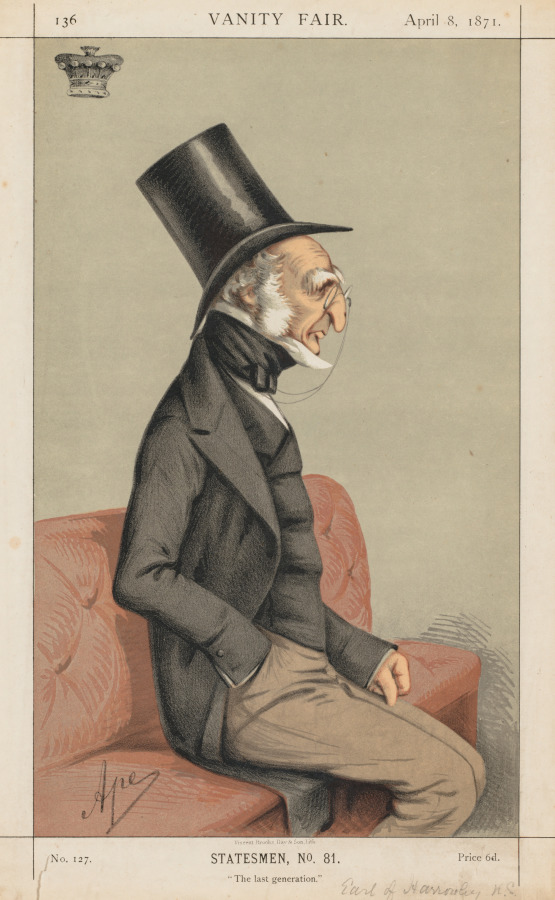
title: Vanity Fair: Statesman No., 81 "The Last Generation"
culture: Italy, 19th century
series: published April 8, 1871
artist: Carlo (Ape) Pellegrini (Italian, 1839–1889)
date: 1871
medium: color lithograph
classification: Print